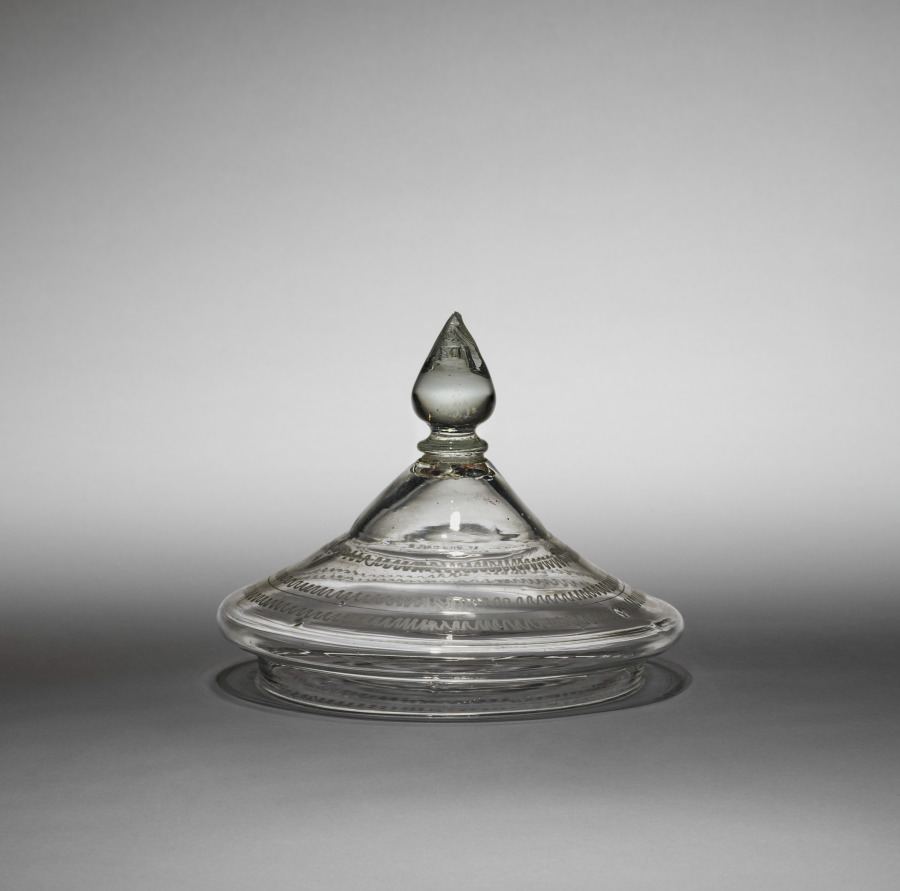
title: Flip Glass (lid)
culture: America, late 18th century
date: late 1700s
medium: glass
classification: Glass